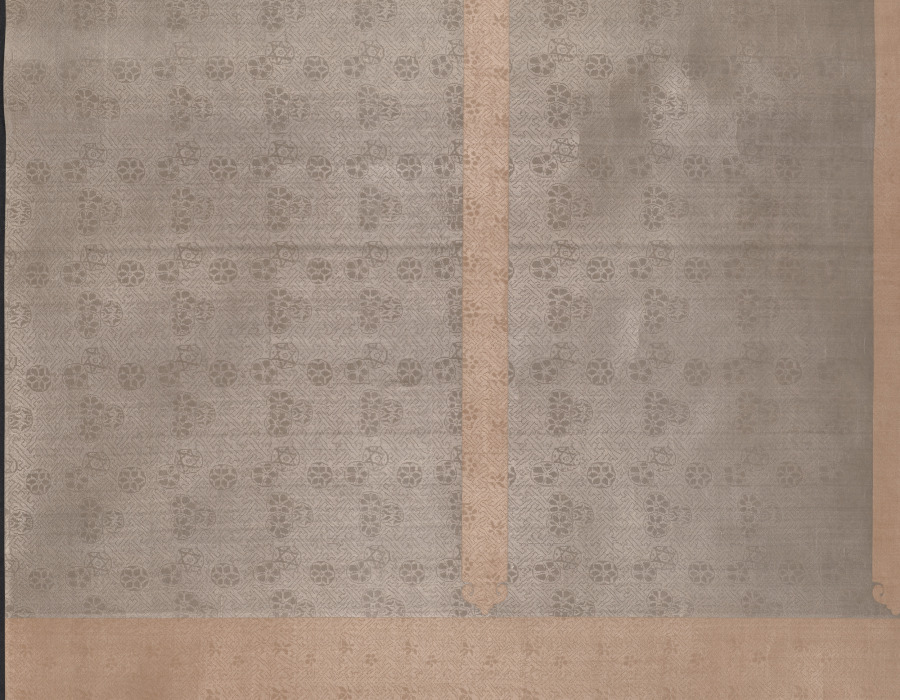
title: Old Trees by a Cool Spring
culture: China, Yuan dynasty (1271-1368)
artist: Li Shixing (Chinese, 1283–1328)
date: 1326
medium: hanging scroll; ink on silk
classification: Painting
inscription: 泰定丙寅年冬十二月薊丘李士行遵道作。[印] 李士行印; 李氏遵道; 遊戲翰墨.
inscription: 薊丘李侯能畫松，蟠根錯節騰蛟龍。 枯梢削鐵歲月古，細葉當風紫翠重。 昔人曾入子固夢，此株豈為秦官封。 畢宏韋偃偕已矣，請公放筆吾將從。 華溪九十翁沈夢麟書 蘊中上人題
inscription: [印] 明善堂所見書畫印記; [印] 怡親王寶